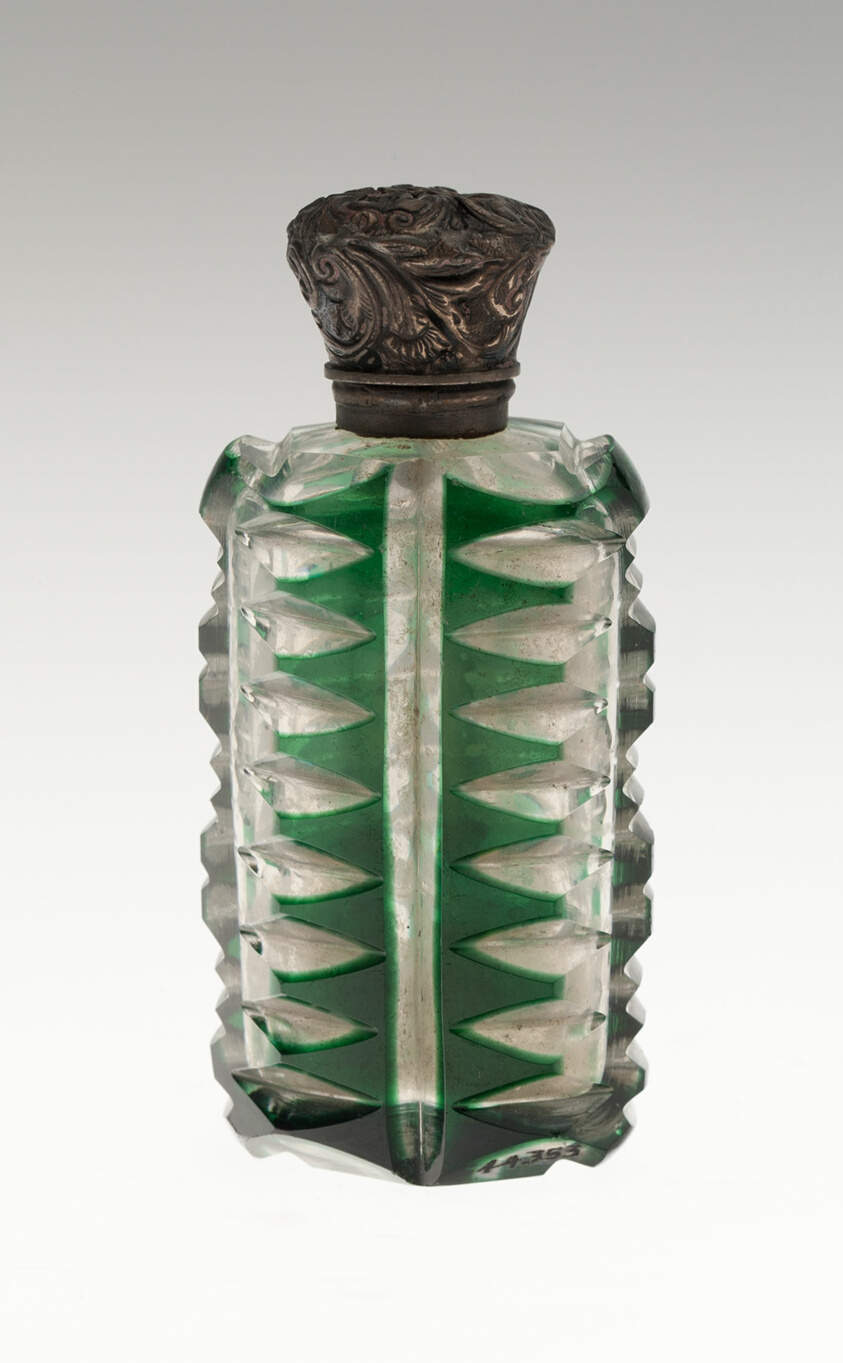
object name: Glass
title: Scent Bottle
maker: Bohemia, Czech Republic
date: c. 1840/50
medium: Glass; cut and colored with metal mounts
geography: Bohemia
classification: glass; european decorative arts